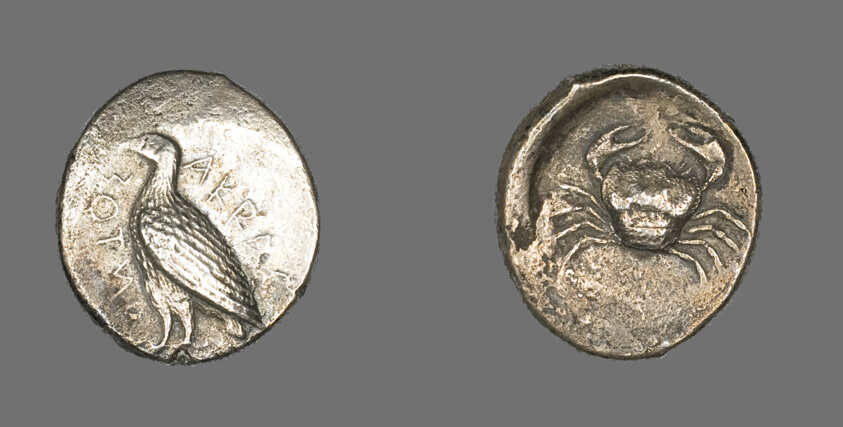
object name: Coin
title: Tetradrachm (Coin) Depicting an Eagle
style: greek, ancient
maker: Greek, minted in Akragas (now Agrigento), Sicily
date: 472-413 BCE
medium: Silver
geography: Ancient Greece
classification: coin; ancient art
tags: animals